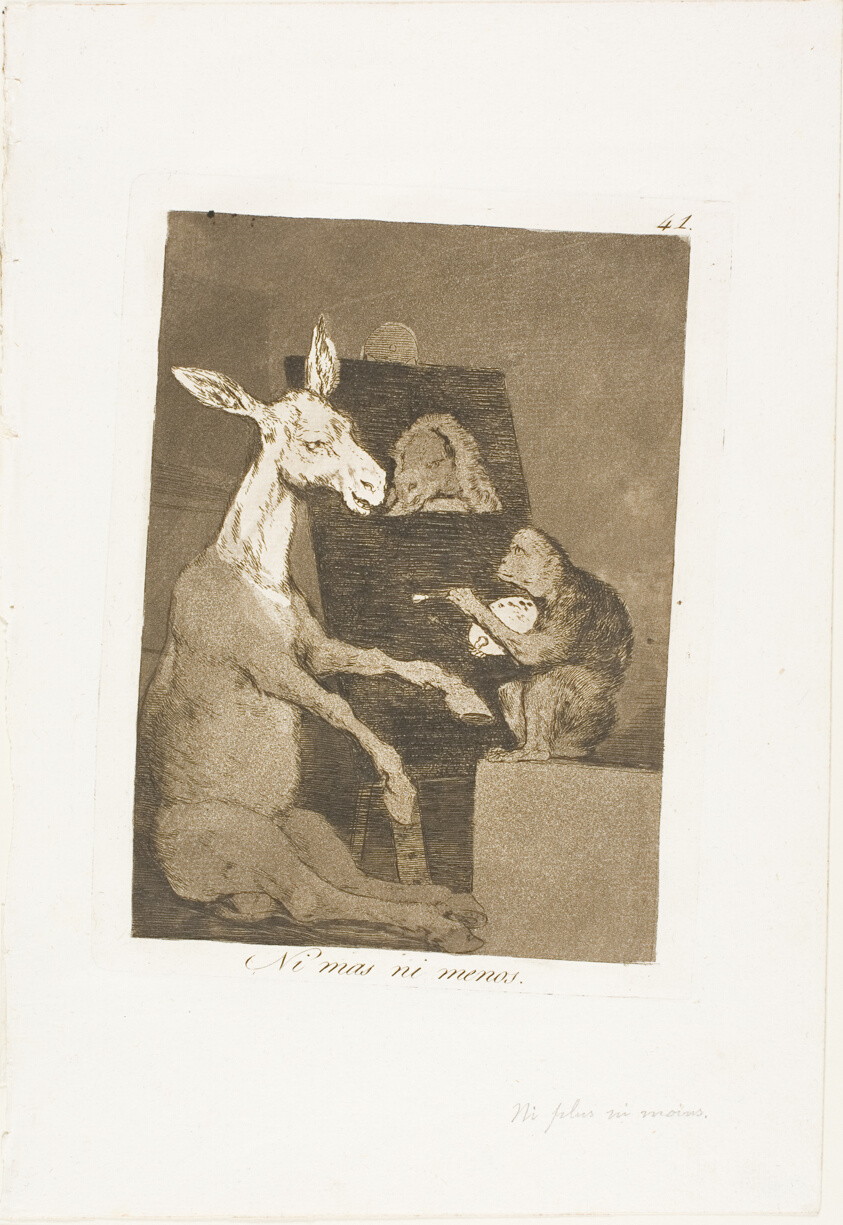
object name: Print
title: Neither more nor less, plate 41 from Los Caprichos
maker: Francisco José de Goya y Lucientes (Spanish, 1746-1828)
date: 1797/99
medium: Etching and aquatint on ivory laid paper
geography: Spain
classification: etching; print; prints and drawing